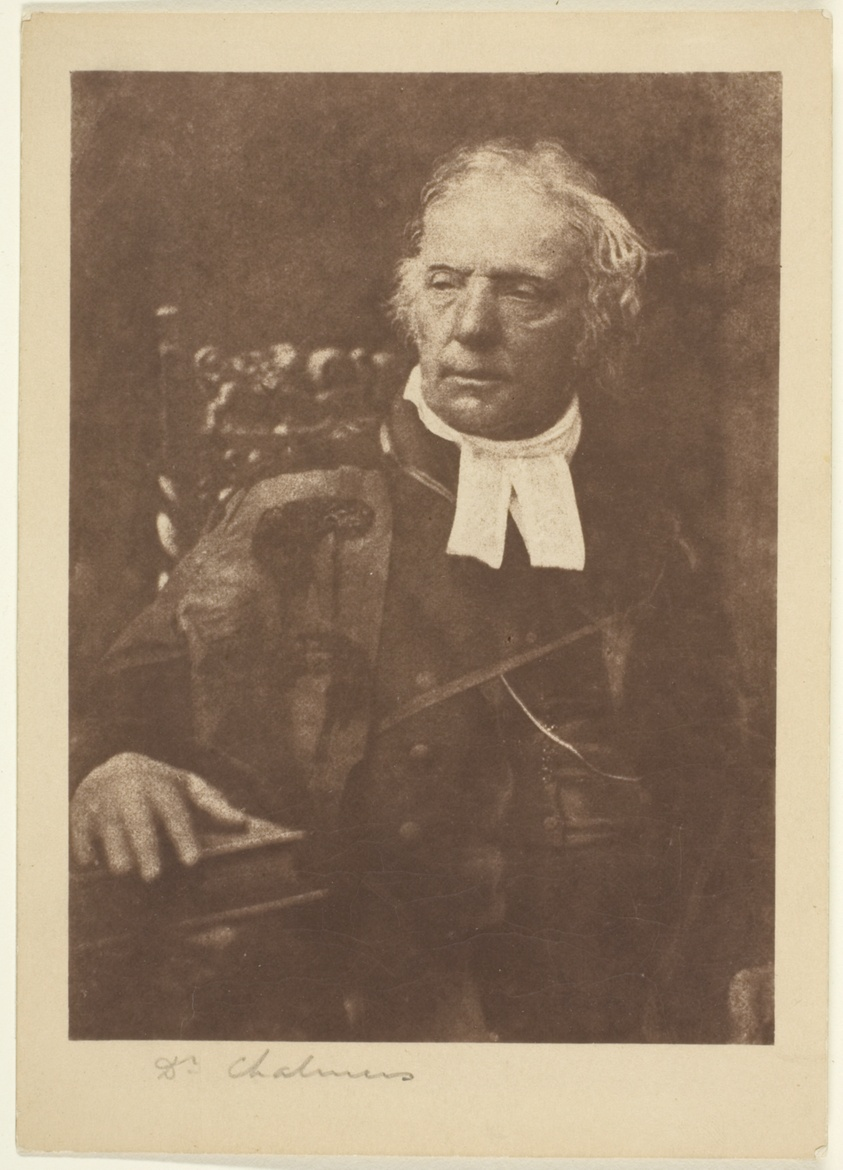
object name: Photograph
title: Dr. Chalmers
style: 19th century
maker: David Octavius Hill (Scottish, 1802–1870) and; Robert Adamson (Scottish, 1821–1848)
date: 1843/46, printed 1890/1900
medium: Carbon print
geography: Scotland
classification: carbon print; pigment process; photographic process; photography; photograph